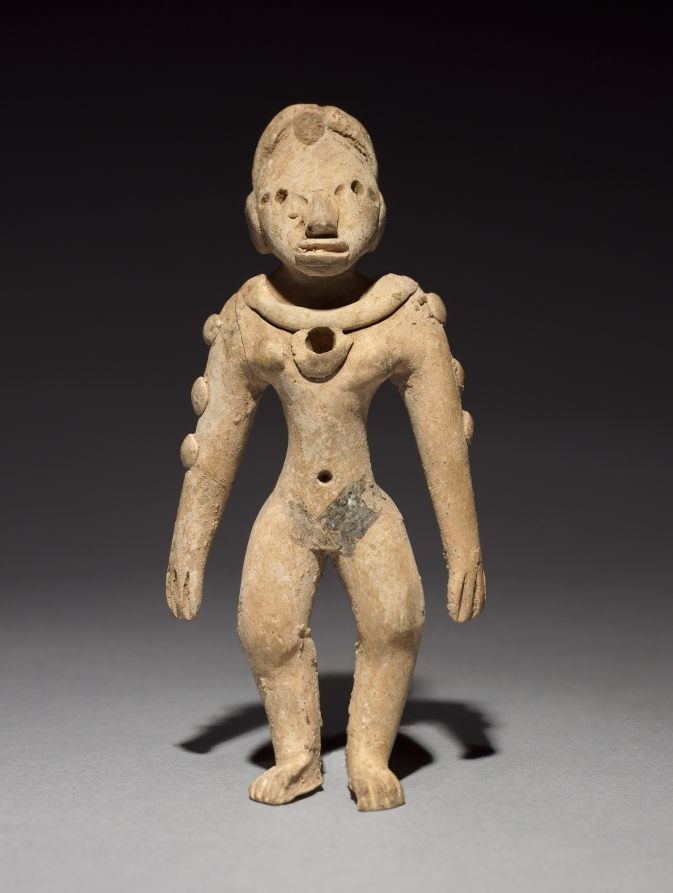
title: Female Figurine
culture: Mesoamerica, Veracruz, Huastec, Panuco Style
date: 300–600 CE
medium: ceramic, pigment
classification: Sculpture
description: Clay was a major medium in ancient Veracruz, located on Mexico’s Gulf Coast, and artists used it to create huge quantities of sculpture ranging from small whistles and figurines like this one to impressive, life-size figural effigies. Meanings are often obscure, but small objects were important enough to have been deposited in tombs and buried offerings.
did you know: Clay figurines were the earliest and most common art form in the ancient Mesoamerican culture region.